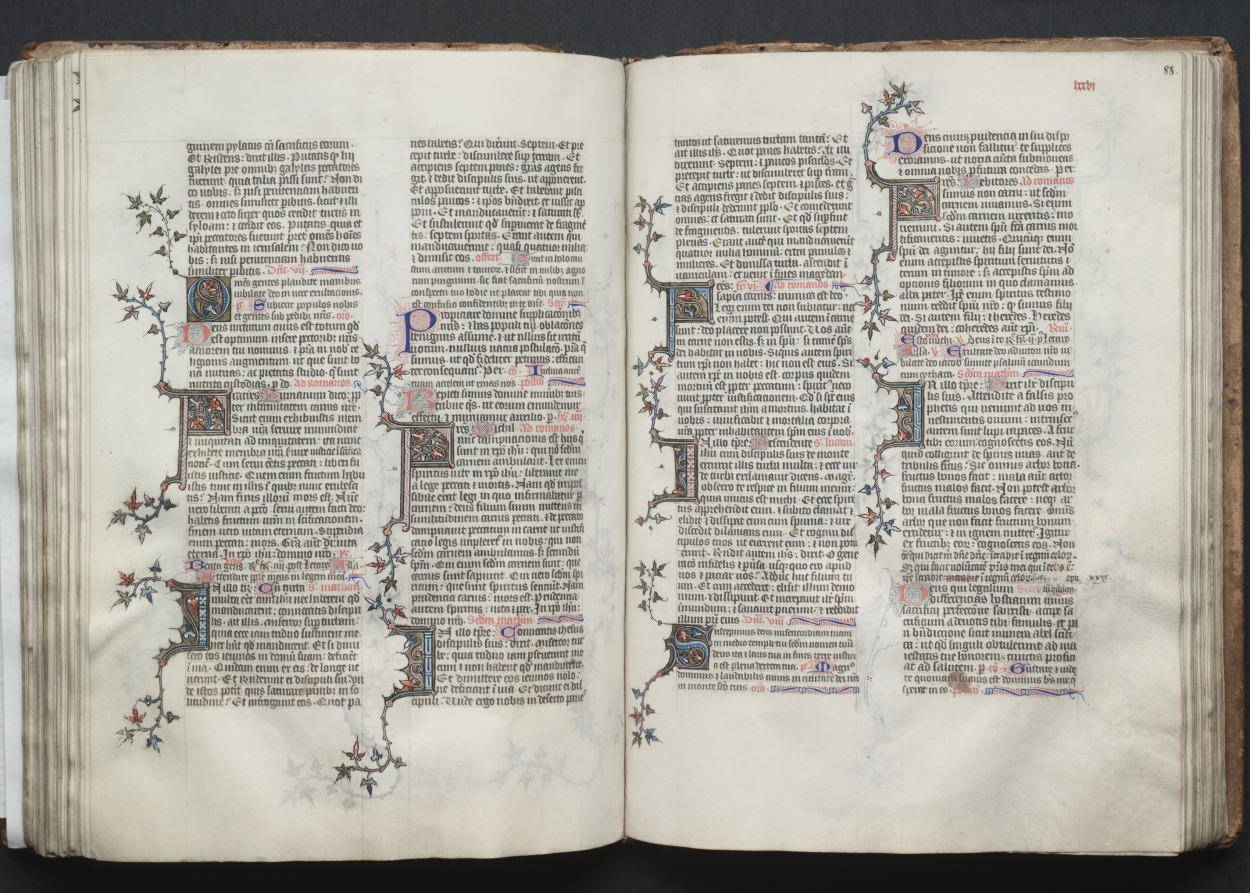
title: The Gotha Missal: Fol. 88r, Text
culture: France, Paris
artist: Master of the Boqueteaux (French)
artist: and Workshop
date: c. 1375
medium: ink, tempera, and gold on vellum; blind-tooled leather binding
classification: Bound Volume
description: The style and quality of this manuscript's decoration is typical of deluxe Parisian books made for aristocratic or royal patrons. Most of the book's decoration appears to be the work of the Master of the Boqueteaux, an artist active at the court of King Charles V (died 1380). His style was apparently shared by a number of book illuminators working in and around Paris. It is very possible that the Gotha Missal belonged to Charles V, but is not provable because the manuscript has no royal portraits and lacks a colophon. Given the book's magnificent decoration, however, it would seem that it was produced for a Valois prince, if not for the king himself. The manuscript receives its name from the German dukes of Gotha, its later owners.